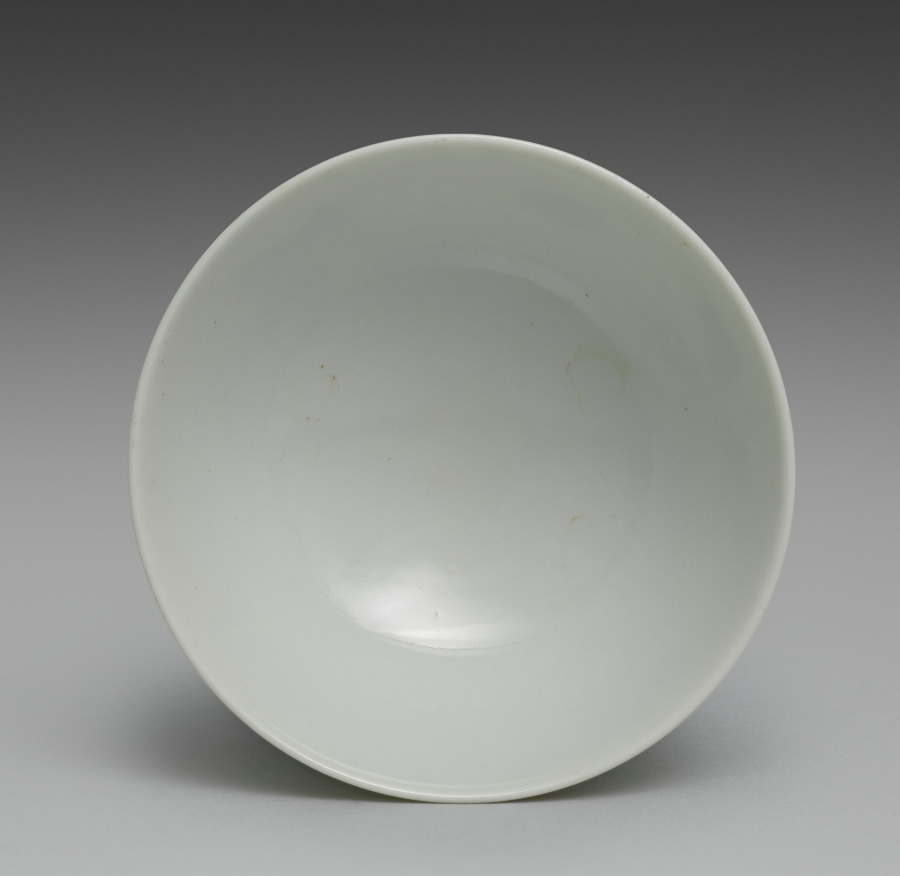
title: Teabowl from Teabowls with Peony and Crabapple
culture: Japan, Meiji period (1868–1912)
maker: Seifū Yohei III (Japanese, 1851–1914)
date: 1893–1914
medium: One from a set of five teabowls; porcelain with underglaze and overglaze color enamels and gold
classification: Ceramic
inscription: 清風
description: Overglaze color enamels are generally called iro-e (literally “color picture”) in the terminology customarily used for porcelain decoration of the Edo period. This set of teabowls is a fine example of Yohei III’s skilled use of the technique, which is identified on this set’s box lid with the alternate phrasing “porcelain with color painting” (jisaiga). Distinct from the way overglaze colors were used in Kakiemon ware from Arita, his designs and applications show a consciousness of porcelain decoration of the Qing dynasty. Here, he combines Chinese models with a sensibility taken from Kyoto ware precedents, including painting with powdered gold (kinrande). The colors used in the bowls are as follows: blue, black, gold, white, light green, green, and pink. The blue appears only inside the footring, as a double band of underglaze color. The black iron, used for stems and leaf veins, is painted over the glaze. The gold, also painted over the glaze, is used for leaves and the centers of flowers, for solid, glossy lines defining detail, or as a semimatte ground. The white of the peony flower is built up to a low relief over the glaze. Yohei has incised lines of varying widths into the pigment, carving away to the bowl’s surface, to differentiate individual petals and their rippled shapes. The light and dark greens, as well as the pink, are painted over the glaze. Of note is how Yohei has first used thinly applied lines of light green to draw the plum branch before applying the opaque iron black. For the plum buds and flowers, he has used a diluted pink with an opaque pink for outline, both over the glaze. In his later works, Yohei used pink both over and under the glaze in a manner similar to underglaze blue, and it can be challenging in some cases to discern which technique he has used. A lidded container in a private collection has a similar design but is augmented with the inclusion of white and purple magnolia blossoms. In contemplating the original decorative program of a set, of which these teabowls may have been a part, it is worth considering that perhaps not all objects included the full range of motifs. In such cases, the composition of the individual object may be best understood within the context of the extended ensemble. Here, the delicate pink plum on one side of the bowl seems slightly unbalanced with the bold white peony on the other, but when seen with other objects with the magnolia and its additional colors and shapes, it is possible to imagine a set with a complex, balanced design across multiple pieces.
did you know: "Seifū" is inscribed on the base in a double band of underglaze color.